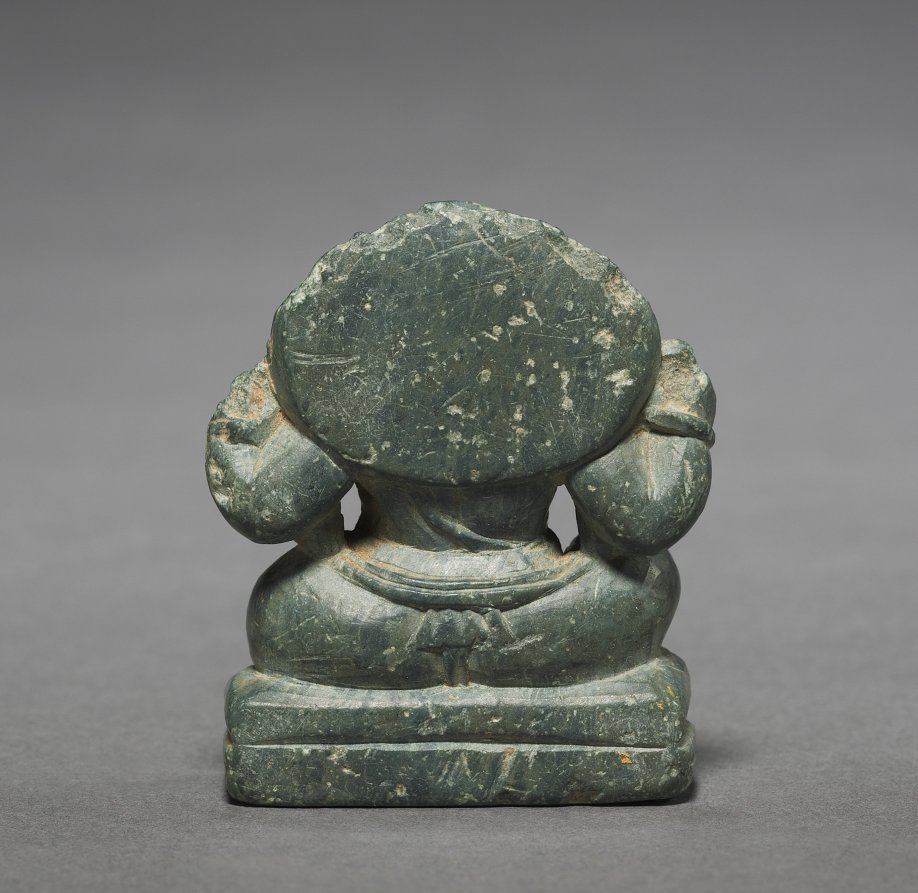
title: Miniature Seated Ganesa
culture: Northwest India or Kashmir, c. 8th Century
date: c. 700s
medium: greenish schist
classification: Sculpture